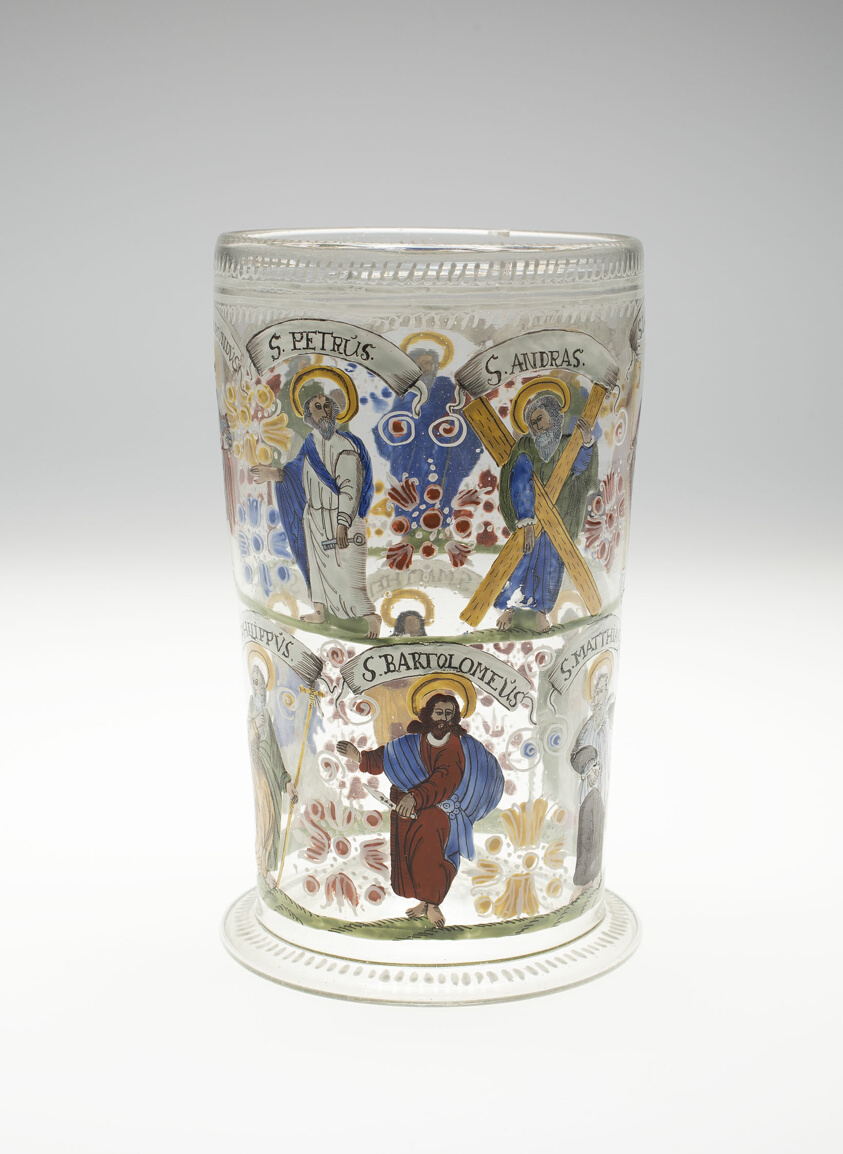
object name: Glass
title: Beaker (Humpen)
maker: Germany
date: 1650/1700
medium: Blown glass with polychrome enamel decoration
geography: Germany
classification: drinking vessel; glass; european decorative arts